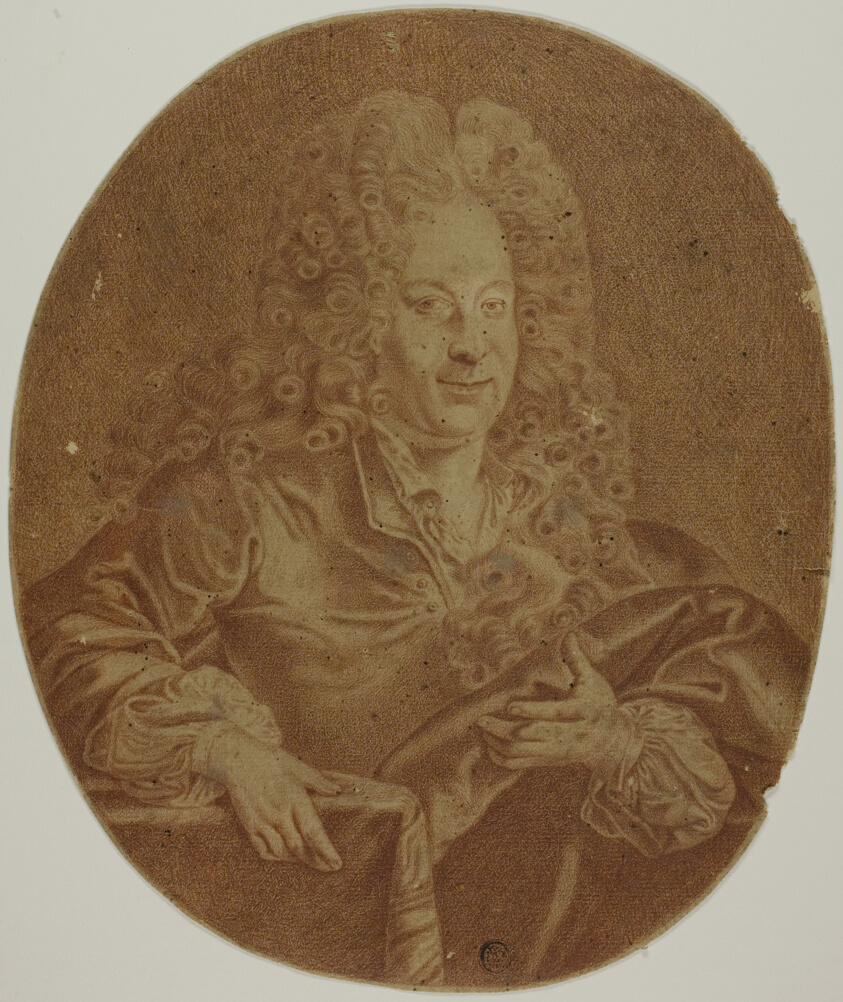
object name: Drawing and Watercolor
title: Oval Portrait of Gentleman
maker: Style of Nicolas de Largillière (French, 1656-1746)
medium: Red chalk on tan laid paper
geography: France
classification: chalk; drawings (visual works); prints and drawing